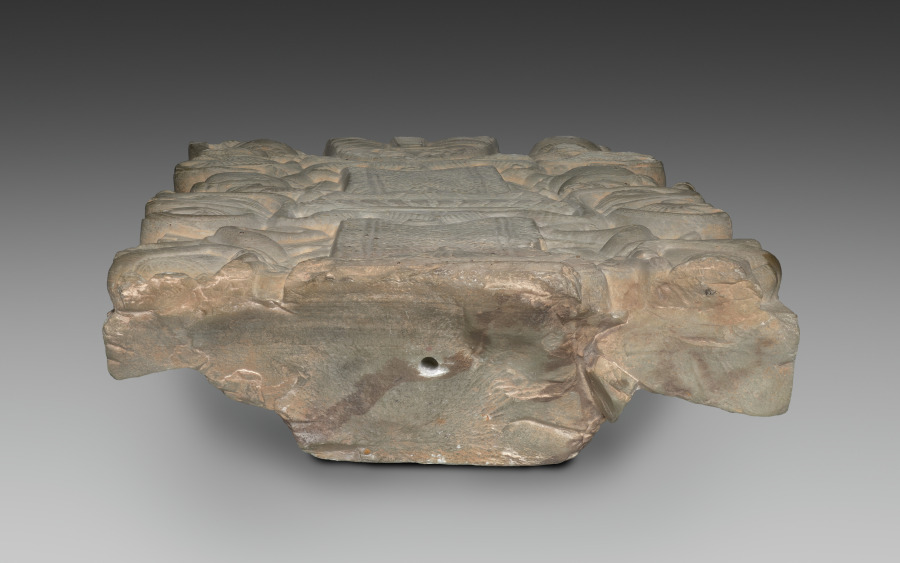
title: Veneration of the Buddha as a Fiery Pillar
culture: Southern India, Andhra Pradesh, Nagarjunakonda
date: 200s CE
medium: limestone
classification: Sculpture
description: At the bottom of this carved panel is the depiction of a pillar incised with cross-hatching and surrounded by a halo of flames. A stylized lotus and a pointed trident symbol marking good fortune and divinity crown the pillar. This image indicates the presence of the Buddha and underscores his superhuman qualities, including radiance and power to work magic. Two male figures hold fly whisks of honor on either side. Above is a golden pillar covered with jewels that the Buddha miraculously generated. Swirling leaves sprout from grooved disks at regular intervals, and celestial beings fly and dance in praise.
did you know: The acanthus leaves sprouting from the pillar echo Greco-Roman motifs.